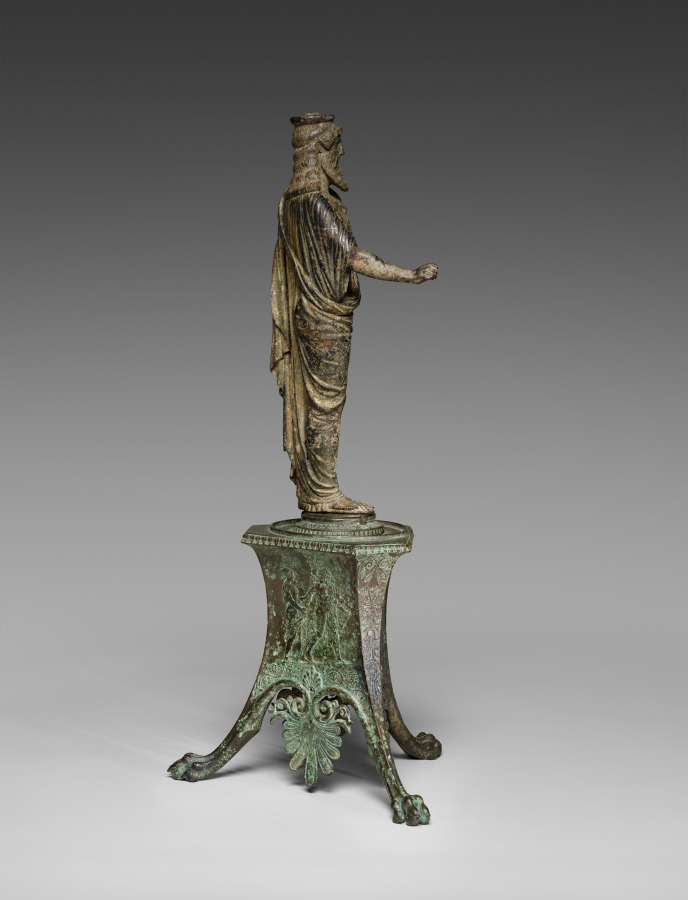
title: Tripod Base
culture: Italy, Roman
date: 100–1 BCE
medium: bronze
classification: Sculpture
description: This unusual tripod base features three clawed feet, an abundance of vegetal ornament, and three different figural scenes in low relief. Two seem to show sanctuary settings: first, a small Archaistic statue of Athena flanked by a woman with small offerings and a man holding a kid and leading two goats; and second, a small youthful male statue behind two beardless figures—perhaps Apollo, with a stag, and Dionysos, holding a thyrsos. The third scene shows Herakles, holding a club while leading a woman, maybe Auge or Alcestis. Although perhaps similarly eclectic in style, the base and the sculpture it now supports differ in their alloys and patinas.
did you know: This elaborate base may have originally supported an ornate lamp (not the statuette now displayed atop it).